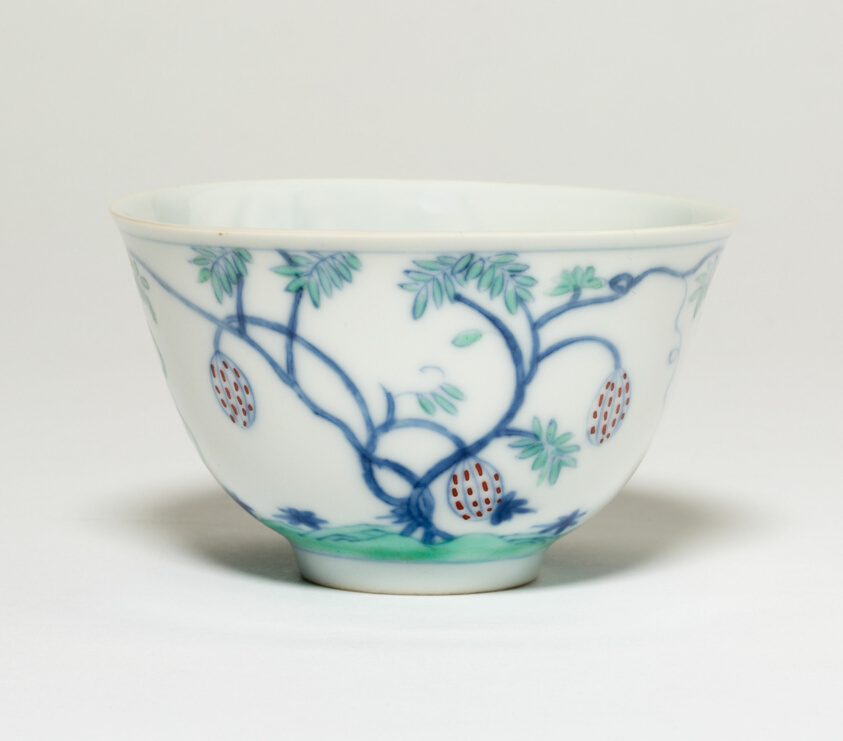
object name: Vessel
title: Cup with Fruit Trees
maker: China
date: Qing dynasty (1644–1911), late Kangxi period (1662–1722), early 18th century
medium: Porcelain painted in underglaze blue and overglaze enamels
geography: China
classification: porcelain; asian art; ceramics; vessel